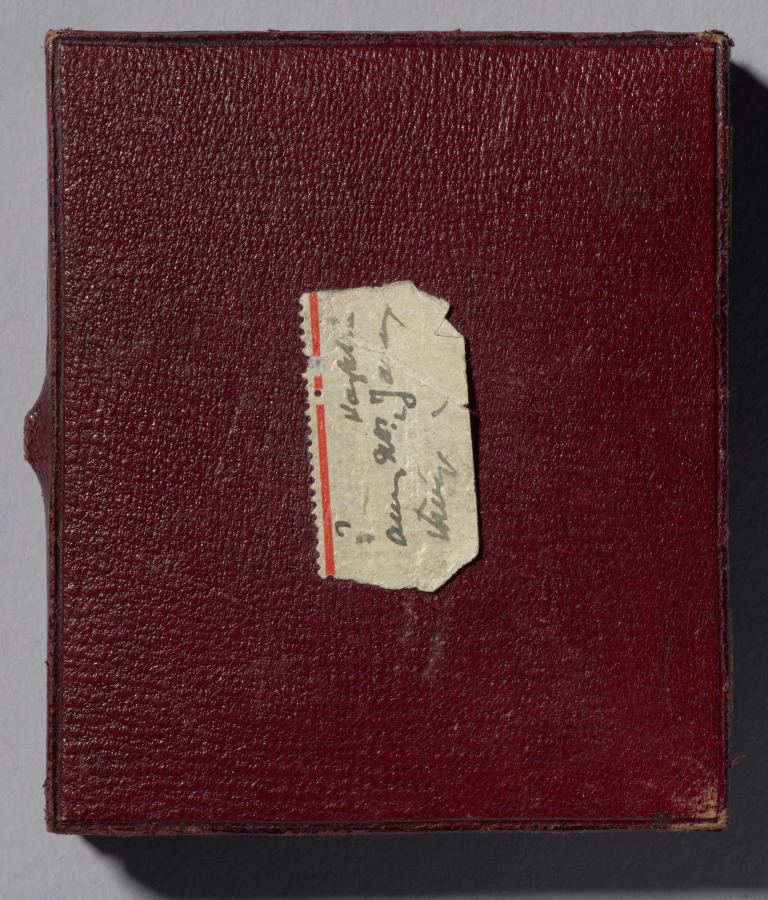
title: High-born lady in white bonnet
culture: France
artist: Antoine Claudet (French, 1797–1867)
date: c. 1855–58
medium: daguerreotype, tinted, sixth plate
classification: Photograph